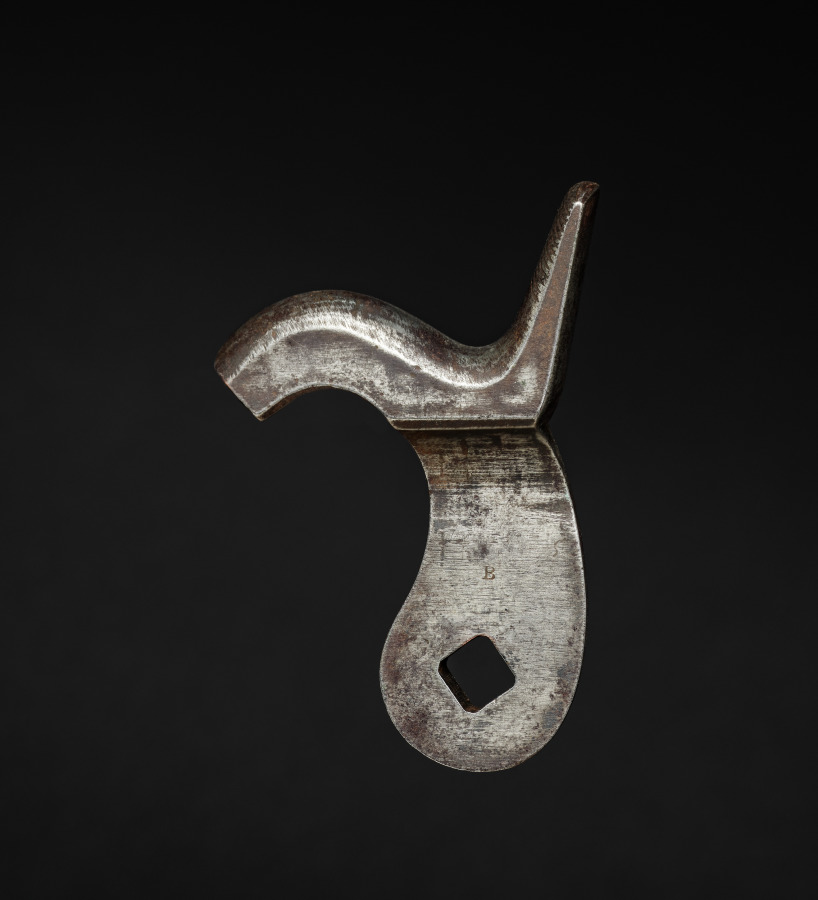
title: Gun-Lock Hammer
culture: England, early 19th century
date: c. 1800–1825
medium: steel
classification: Arms and Armor